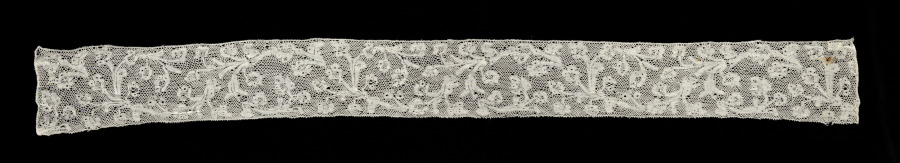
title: Lace Edging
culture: Italy, Abruzzi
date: 1700s–1800s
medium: Bobbin lace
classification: Lace